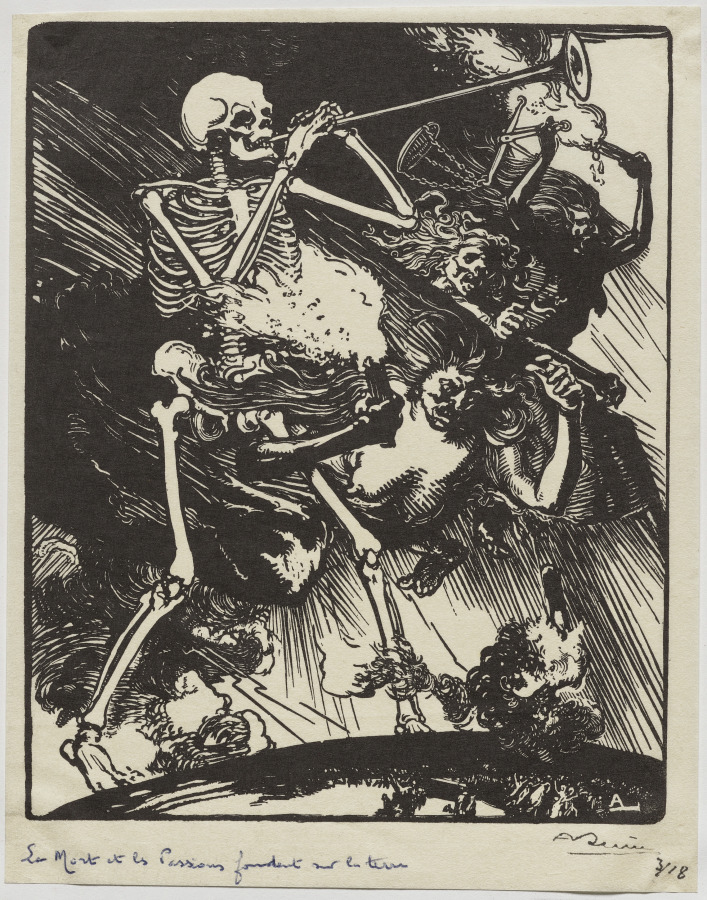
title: La Mort et les Passions fondant sur la terre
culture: France, 20th century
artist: Auguste Louis Lepère (French, 1849–1918)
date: 1914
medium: black crayon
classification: Drawing